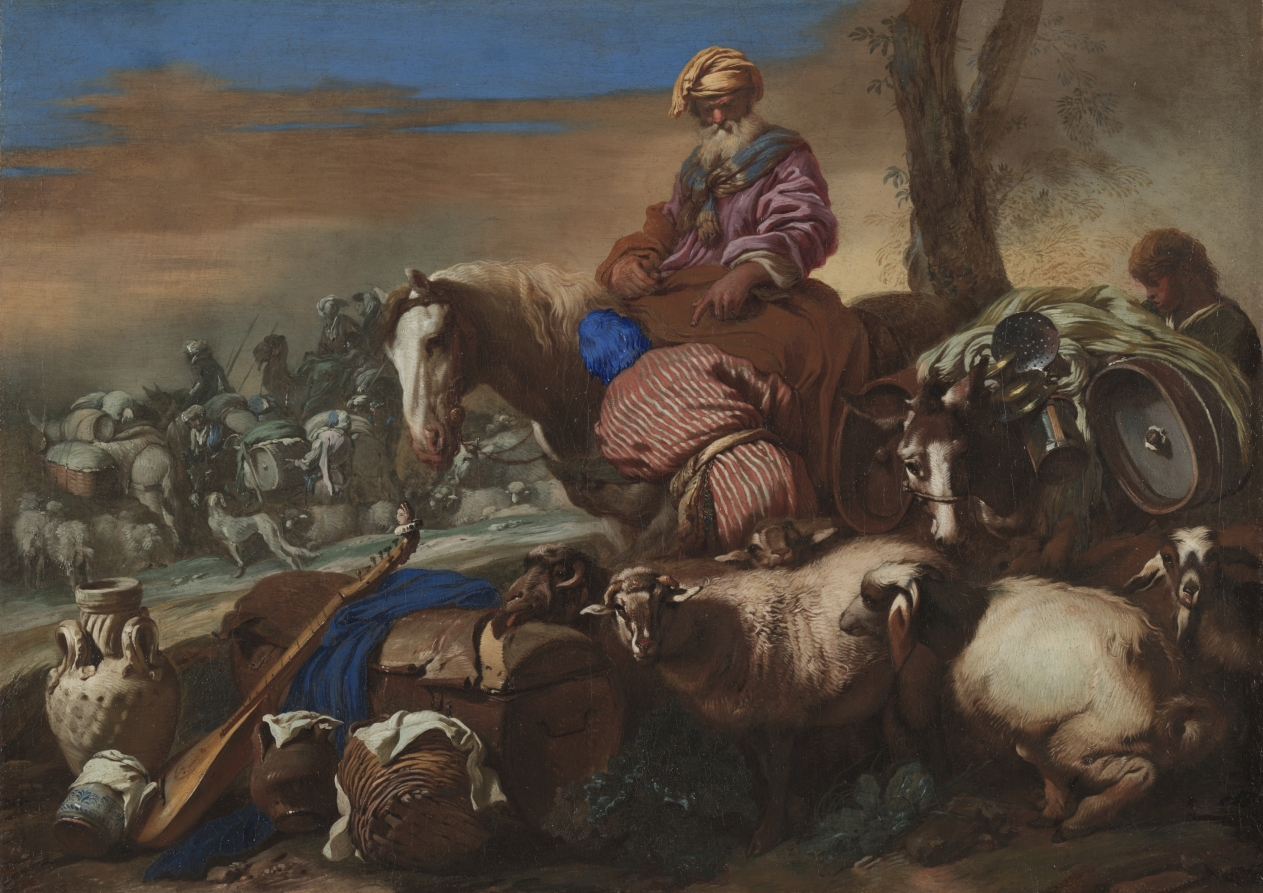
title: The Oath of Abraham’s Servant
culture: Italy, 17th century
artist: Giovanni Benedetto Castiglione (Italian, 1609–1664)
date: c. 1650–59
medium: oil on canvas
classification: Painting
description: This work has long been called Journey of a Patriarch in the belief that the artist intended no specific subject. The painting instead depicts a moment in the Old Testament book of Genesis. Abraham secures a pledge from his servant to find a wife for Abraham’s son Isaac. The servant wears a zamt, a goatskin cap common in North Africa in the 1600s, here dyed an unusual shade of blue, a color associated with faith and trust, symbolizing his sacred oath.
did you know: The musical instrument at the left symbolizes love, foreshadowing the wedding the servant pledges to facilitate.